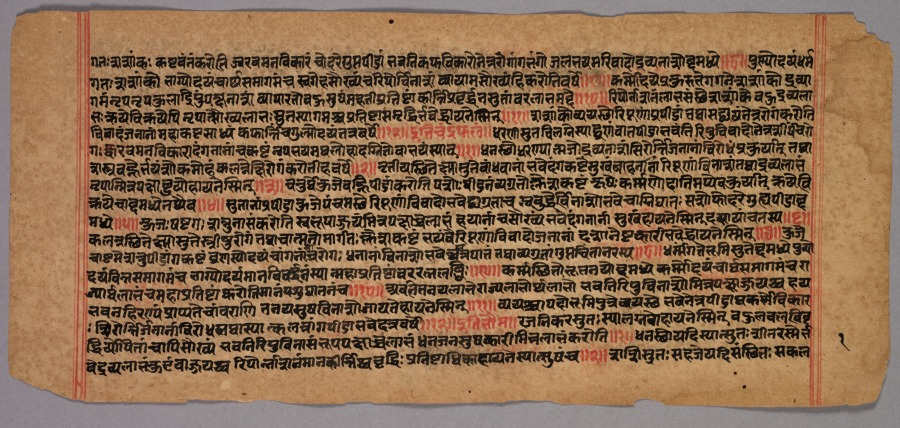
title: Page from a Jaina Manuscript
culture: India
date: 1400s–1500s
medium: ink on paper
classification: Manuscript